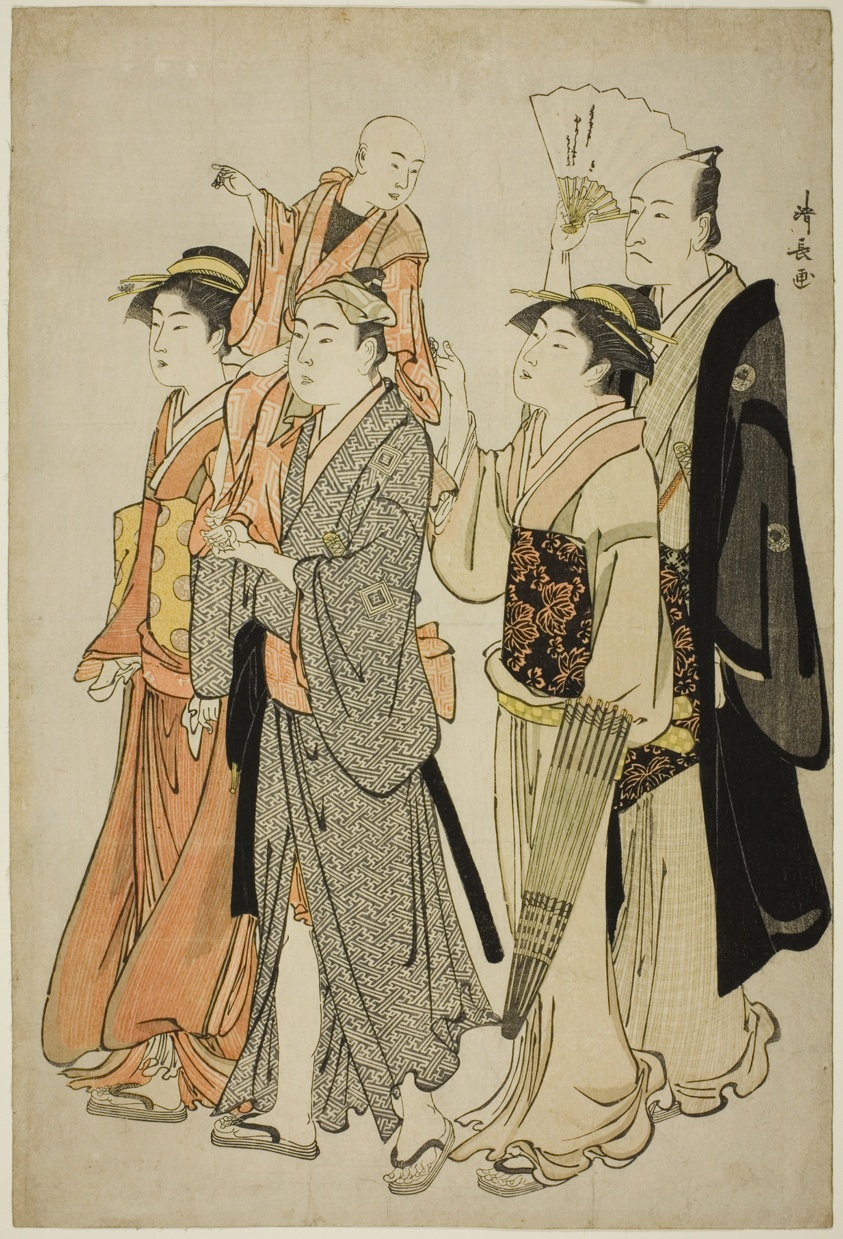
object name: Print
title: The Actor Ichikawa Danjuro V and his family, from an untitled series of four prints showing Actors in private life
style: Japanese (culture or style)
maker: Torii Kiyonaga (Japanese, 1752-1815)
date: c. 1783/84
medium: Color woodblock print; oban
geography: Japan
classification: woodblock print; print; asian art